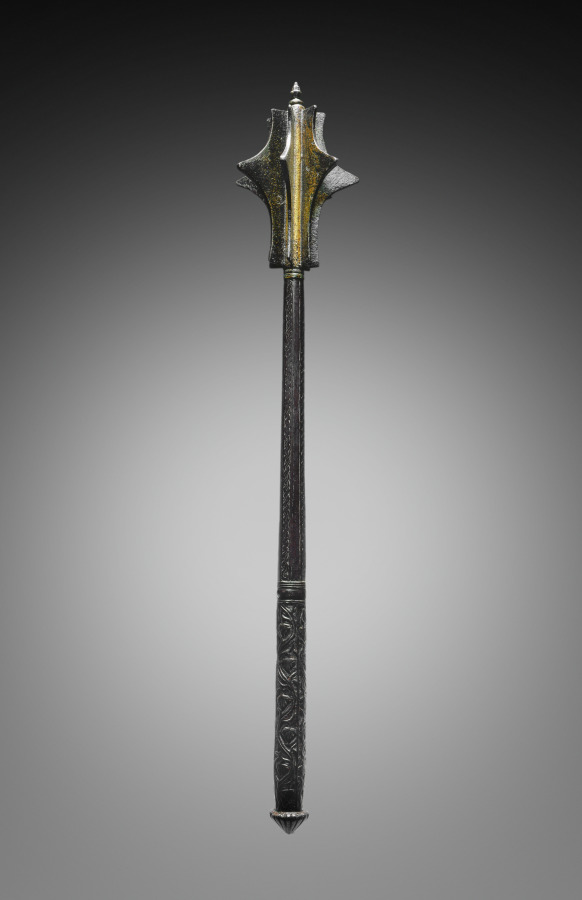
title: Seven-Flanged Mace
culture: Italy (?), 16th century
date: c. 1540–50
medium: gilded russet steel; with chiseled foliate decoration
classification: Arms and Armor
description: The mace was primarily a weapon for mounted warriors in both actual combat and courtly contests. For this reason it was regarded as a knightly weapon. Arming oneself with a mace had gradually taken on significance among the nobility and commanding officers. It eventually came to be considered a badge of rank, to be carried by its owner in parades and other ceremonial occasions, as this decorated example certainly was.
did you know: In use throughout the middle ages, the mace became increasingly popular in the 1400s and 1500s because edged weapons (such as swords) were ineffective against fully developed plate armor.